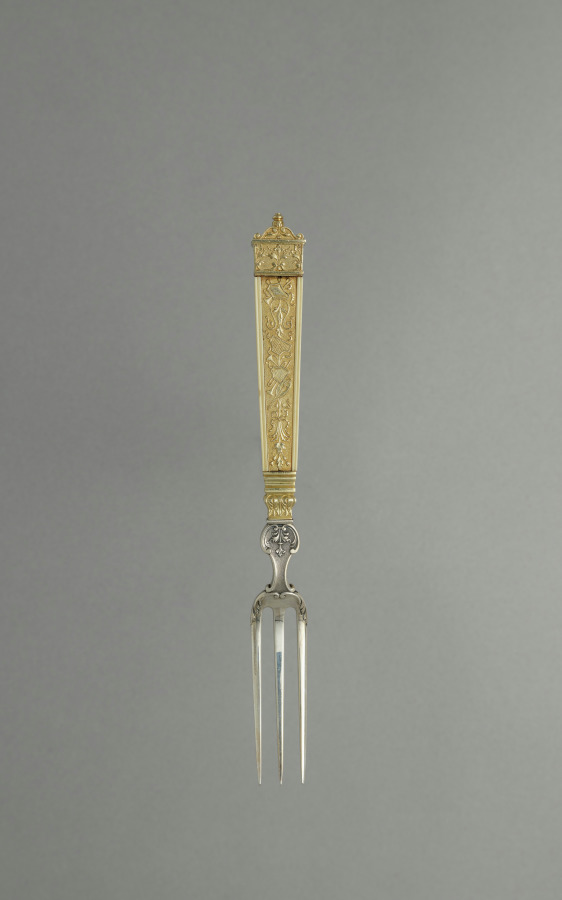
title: Dessert Fork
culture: France, 19th century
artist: Maison Cardeilhac (French)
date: c. 1880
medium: gilt silver and ivory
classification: Silver